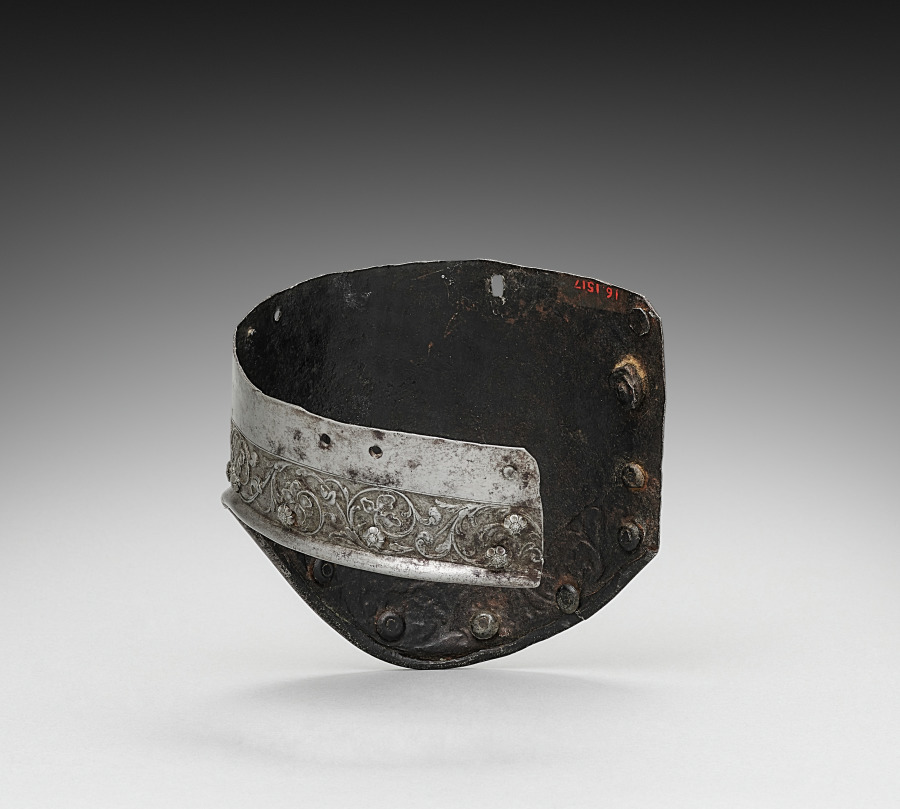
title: Upper Arm Canon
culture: Itlay, Milanese style of 16th century, probably 19th century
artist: attributed to Negroli Workshop (Italian, c. 1500–1561)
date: 1800s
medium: steel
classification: Arms and Armor